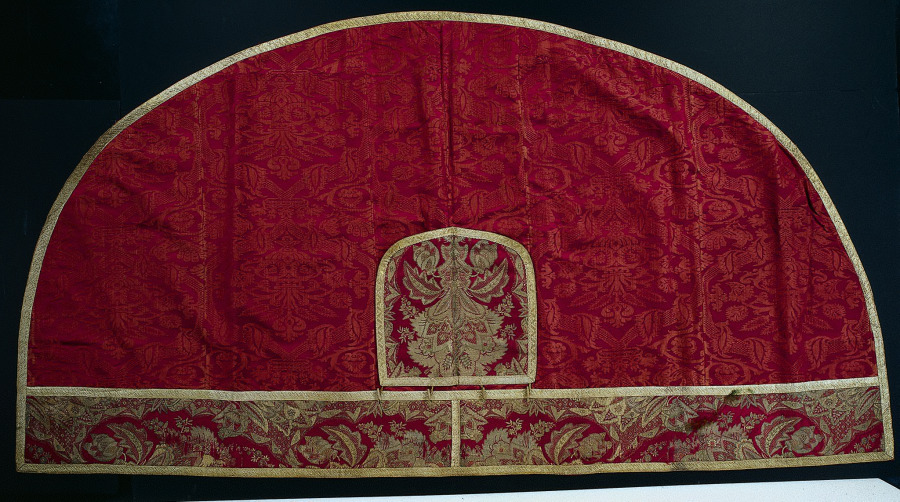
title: Priest's Red Cope, Orphrey and Hood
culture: France and Italy, Orphrey and hood: France, Lyon, Regency period, 1715-1725; Cope: Italy, late 16th - early 17th century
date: late 1500s - early 1600s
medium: Cope: damask weave, silk; Orphrey and hood: brocade, silk and silver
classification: Textile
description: Liturgical copes are used for processions especially by those who assist the celebrant. They evolved from a secular outer garment with a hood to protect the wearer from wind and rain. Hoods remained although they became decorative and nonfunctional. This Italian silk damask features large symmetrical bouquets in urns within curved lattices bearing crowns flanked by birds. The French orphrey band, or ornamental border, along the front edges and hood incorporates small ornament associated with prestigious lace amid the formal foliate design.